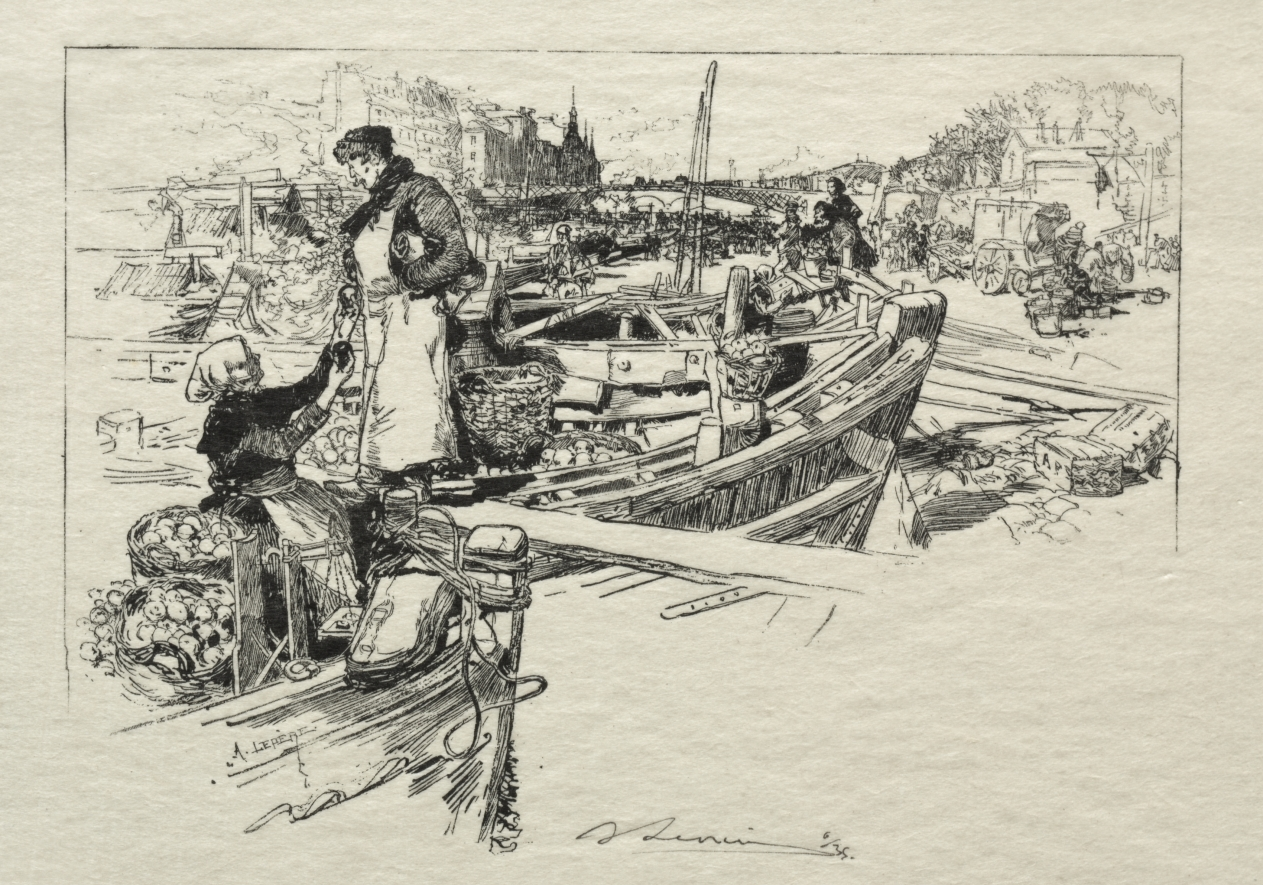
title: Le Marché aux Pommes, No. 1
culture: France, 19th-20th century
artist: Auguste Louis Lepère (French, 1849–1918)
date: 1890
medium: wood engraving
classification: Print